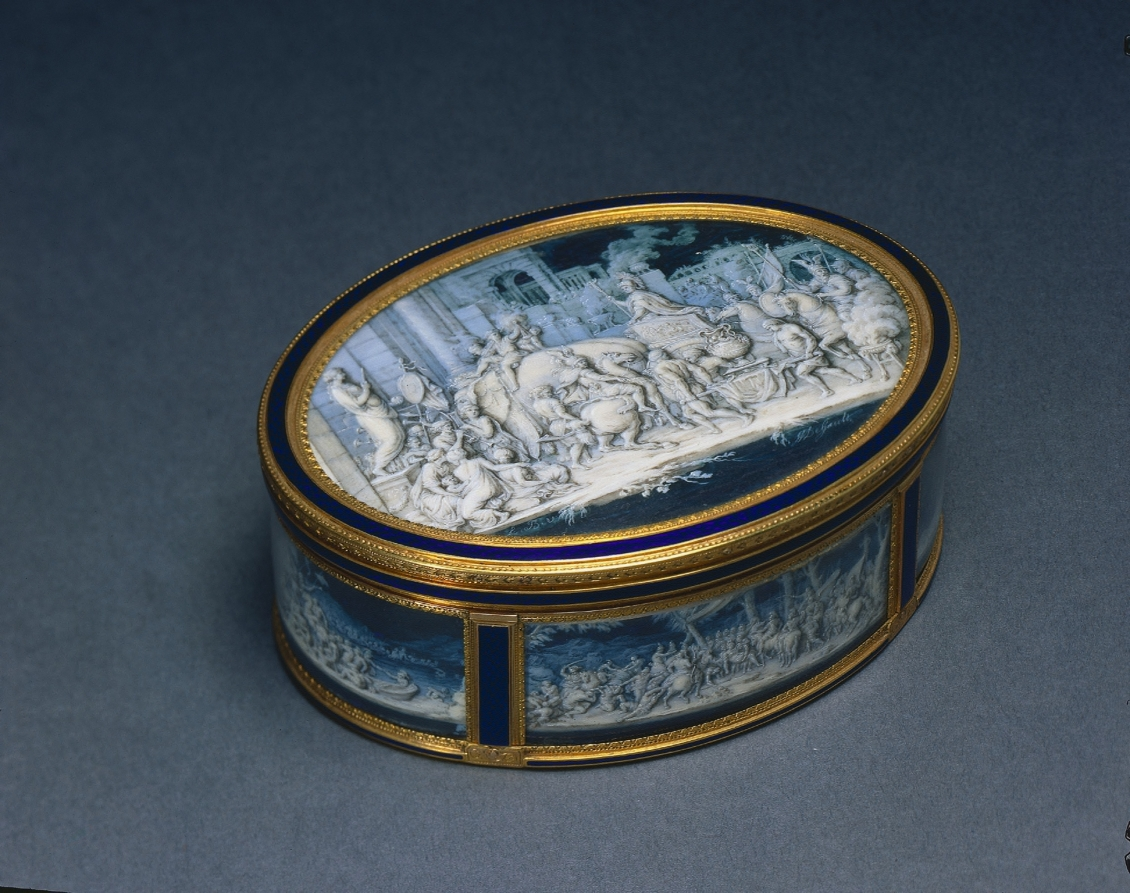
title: Snuff Box (Tabatière)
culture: France, 18th century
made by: Pierre Marie Gault De Saint-Germain (French, 1754–1842)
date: 1779–80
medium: gold and enamel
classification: Miscellaneous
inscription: [Warden's mark for Paris, 1779-1780, inside bottom; inside cover]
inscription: [Illegible maker's mark, inside bottom; inside cover]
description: Decorated with images derived from ancient Greek and Roman history in the style of cameos, intricately carved gemstones, this box evokes the rising neoclassical imagery in France. The scenes on the box recount several key events in the life of Alexander the Great. The enameled works were inspired by a series of prints by Sébastien Leclerc which drew from a series of paintings by Charles Le Brun.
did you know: The original series painted by Charles Le Brun, The Battles of Alexander (Les Batailles d’Alexandre) (1600s), was commissioned by King Louis XIV of France.